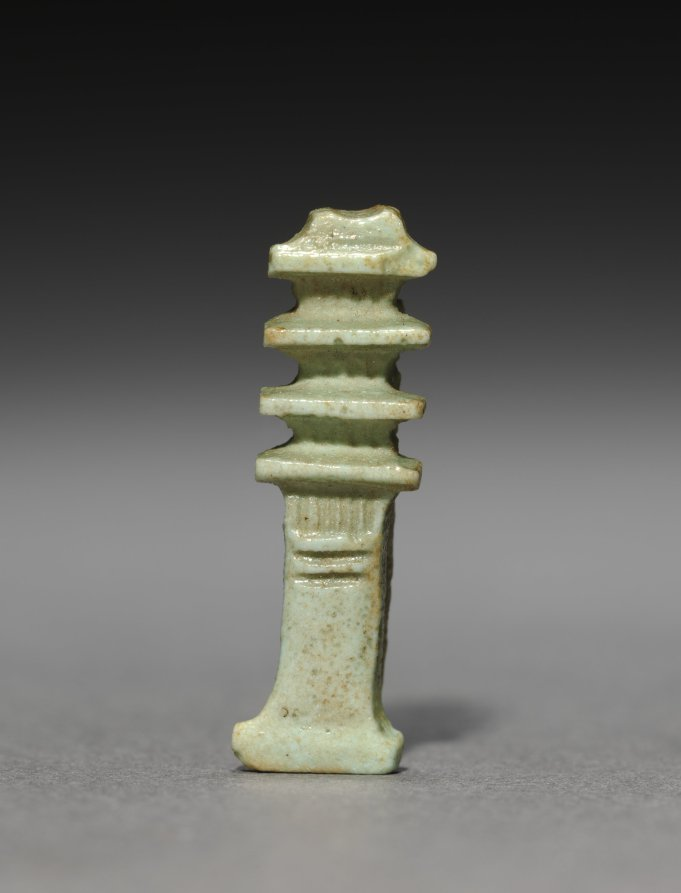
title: Pair of Djed-Pillar Amulets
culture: Egypt, Late period (715–332 BCE), Dynasty 30–Greco-Roman period (332 BCE–395 CE), Ptolemaic dynasty (305–30 BCE)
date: 380–30 BCE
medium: gray-green faience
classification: Amulets